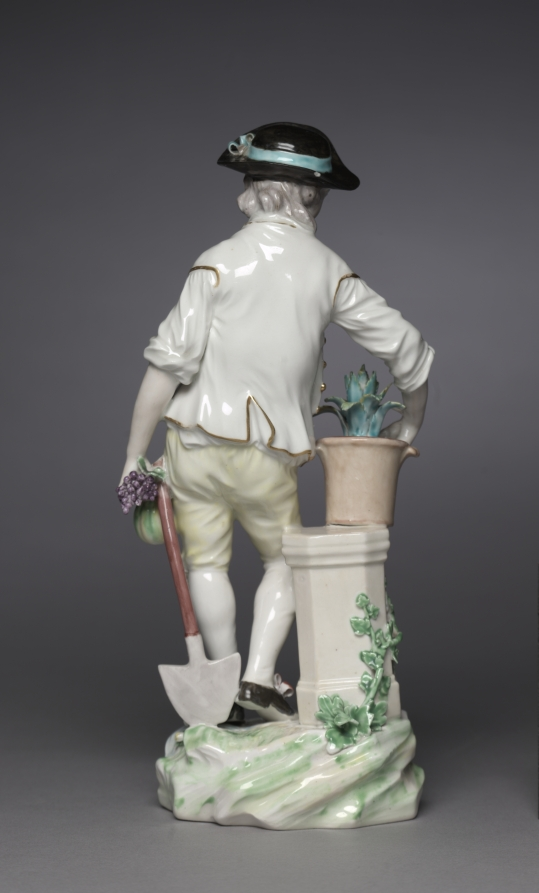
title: Earth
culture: England, Derby, 18th century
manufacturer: Derby Porcelain Factory (Chelsea-Derby Period, 1770–84)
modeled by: Pierre Stèphan (Swiss, active 1760–98)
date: c. 1775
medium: soft-paste porcelain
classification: Ceramic